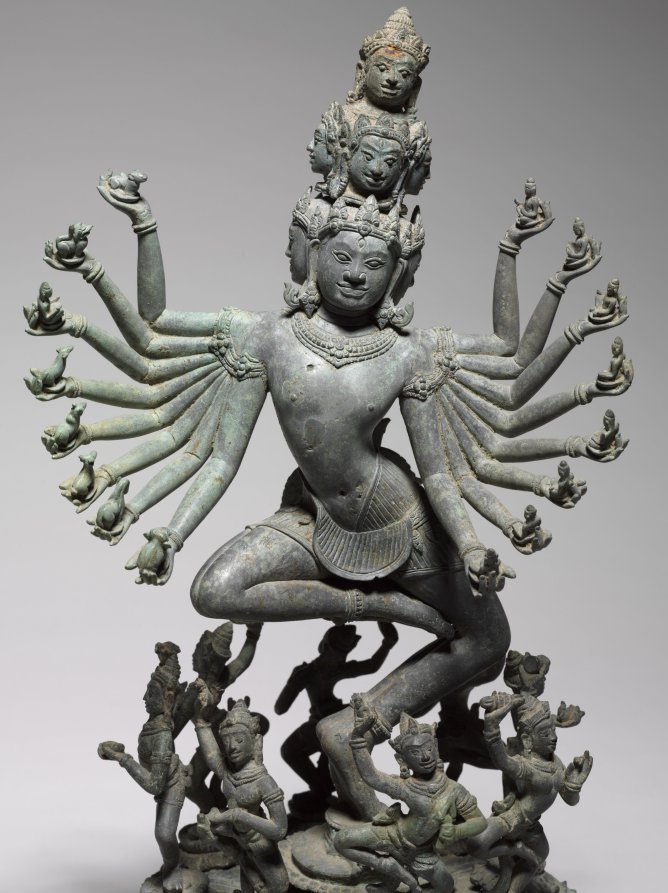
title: Hevajra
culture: Northeastern Thailand, former kingdom of Angkor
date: c. 1200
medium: Bronze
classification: Sculpture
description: Hevajra was an important figure signaling the practice of Buddhist rituals. King Jayavarman VII placed particular emphasis on Hevajra during consecration rituals and set up a colossal stone sculpture of dancing Hevajra at the east gate of his fortified city in the Khmer capital at Angkor. In the Cambodia of Jayavarman VII, tantric Buddhism became public and widespread, practiced together with other more mainstream forms of Buddhism, Hinduism, and ancestor worship. The iconography of Hevajra is described in detail in a text that bears his name, the Hevajra-tantra, first composed in India probably in the 800s. Hevajra has eight heads, sixteen arms, and four legs. His left hands hold images of Indic gods; wealth, death, sun, moon, fire, wind, water, and earth. In his right hands are animals: bull, lion, human, cat, camel, sheep, horse, and elephant. They all sit in skull cups, objects also used in tantric rituals. He dances on a corpse that embodies ignorance and is surrounded by eight yoginis who dance triumphantly in a ring around him. Yoginis functioned as intercessors between human practitioners and enlightened beings. Many bronze images of Hevajra were made during the reign of Jayavarman VII, but few survive in as pristine condition as this example. According to scientific analysis and curatorial reports, this sculpture survived in a clay vessel submerged in water, which accounts for its high tin content and unusual gray patina. Samples from the clay core reveal the presence of the mineral feldspar, a characteristic of clay from the Isaan plateau, on the other side of the mountain range not far from Banteay Chhmar, in present-day Thailand.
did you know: Hevajra, the Tantric Buddhist deity who personifies Enlightenment, dances vigorously to symbolize the human soul's liberation from the snare of existence.